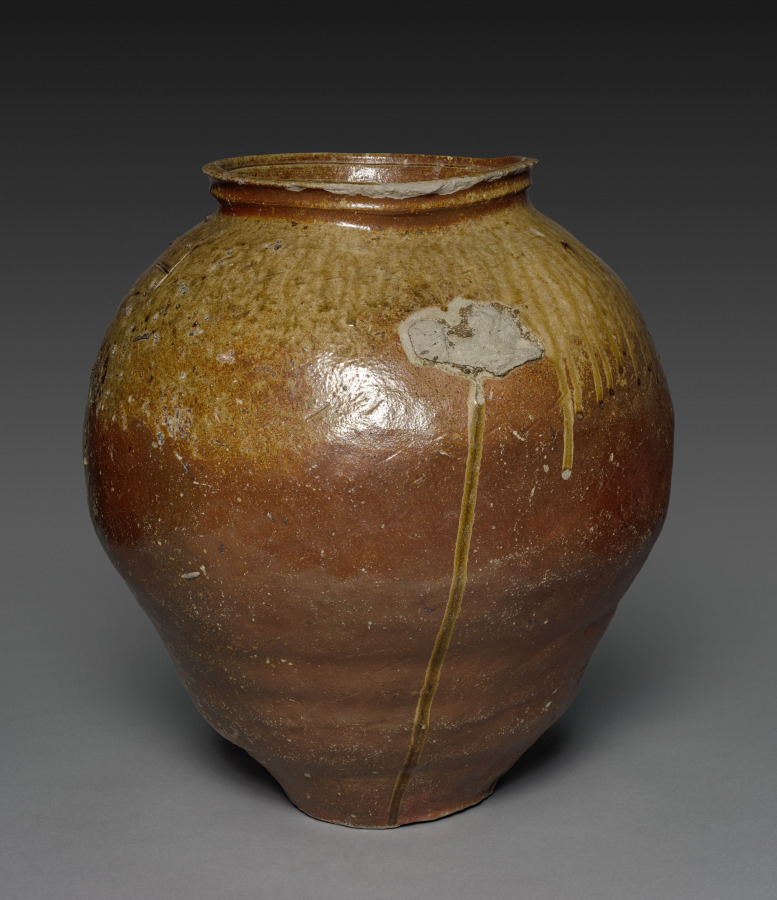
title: Storage Vessel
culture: Japan, Muromachi period (1392–1573)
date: 1400s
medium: stoneware with natural ash glaze (Echizen ware)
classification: Ceramic